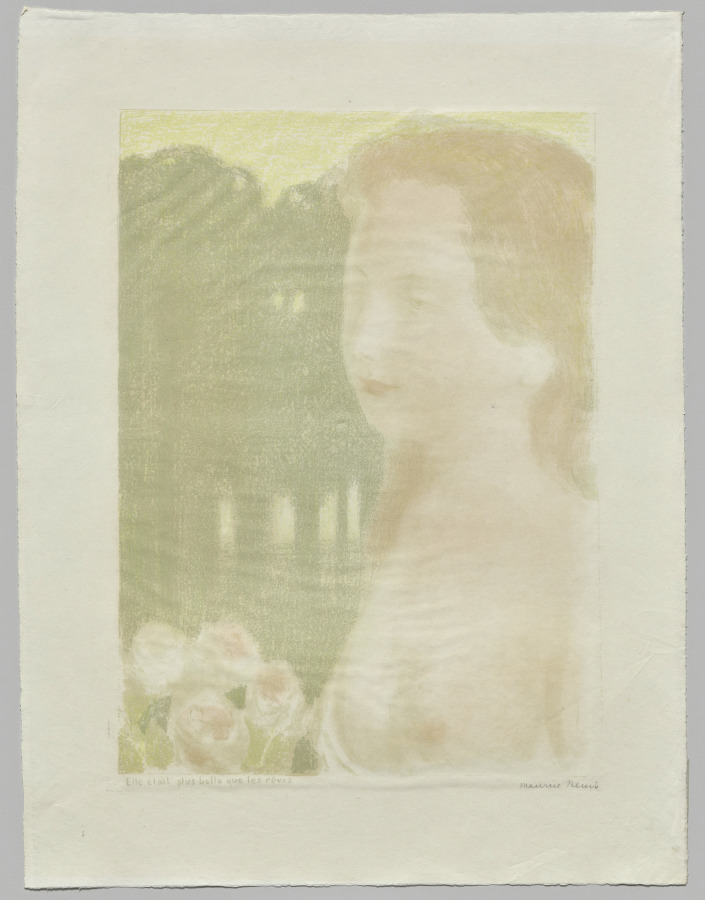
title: She Was More Beautiful Than Dreams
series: Love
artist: Maurice Denis (French, 1870–1943)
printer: August Clot (French, 1858–1936)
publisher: Ambroise Vollard (French, 1867–1939)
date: 1899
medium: color lithograph on wove paper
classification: Print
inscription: Recto, lower left: “Elle était plus belle que les rèves”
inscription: In graphite, recto, lower right: “Maurice Denis (signed)”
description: Maurice Denis belonged to the Nabis, a group of artists who came together in 1889 to pursue a radical new style informed by subjective experience and emotion. This print is from a series in which Denis explored his devotion to his wife, Marthe, by depicting her in a variety of settings alongside titles drawn from his own journal. The vague but evocative images were meant to encourage the viewer to draw connections to the theme and meditate on its meaning.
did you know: Maurice Denis was a devout Catholic and often drew visual connections between his wife, Marthe, the subject of this print series, and the Virgin Mary.